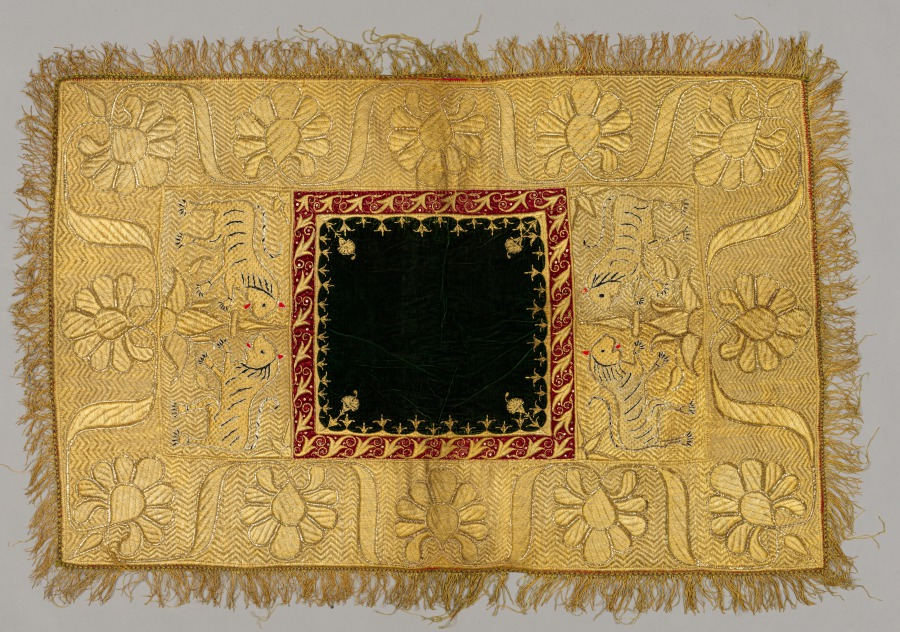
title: Embroidered Cover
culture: India, 19th century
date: 1800s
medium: embroidery: silk, metal, and cotton thread on cotton ground; silk edging and velvet appliqué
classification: Embroidery